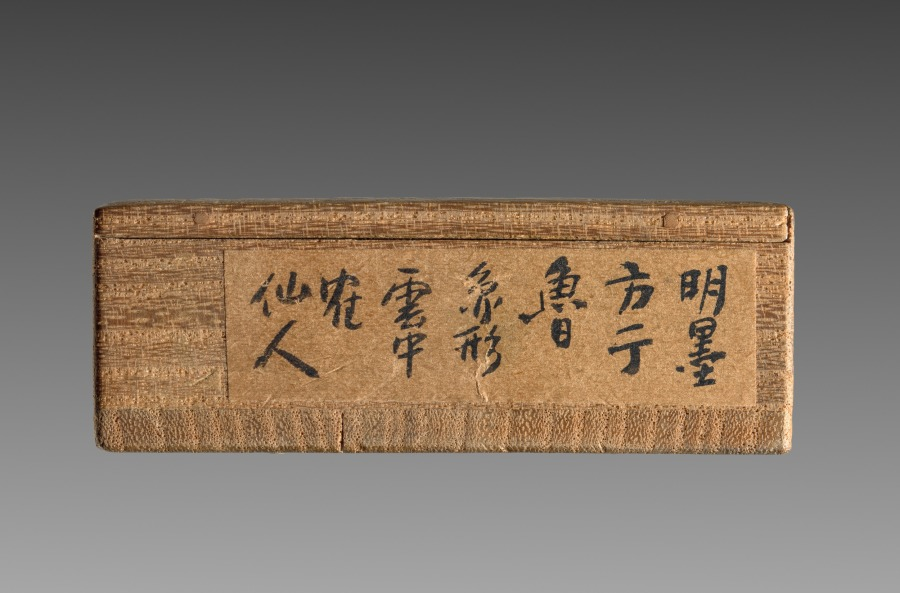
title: Ink Cake with Wang Ziqiao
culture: China, Ming dynasty (1368-1644) - Qing dynasty (1644-1911)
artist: attributed to Fang Yulu (Chinese, active c. 1570–1619)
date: c. 1600s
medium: Molded ink and gold pigment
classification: Miscellaneous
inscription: Mark on base: 于魯監製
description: Ink cakes were dissolved with water to be used for writing and painting. This ink cake depicts the immortal Wang Ziqiao riding a crane and playing a sheng (wind instrument with reeds). Legend says that he was a prince who became a Daoist immortal. The design was likely borrowed from an illustrated Ming dynasty book on Daoist immortals printed in Anhui, the Liexian Quanzhuan. Ink cakes using Fang Yulu’s name, a famous ink maker in Huizhou, Anhui province, may just as well be products of followers who aspired to profit from his fame. His greatest local rival was his former mentor Cheng Dayue (1541–after 1610).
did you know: The front, back, and sides of this ink cake are partially gilded.